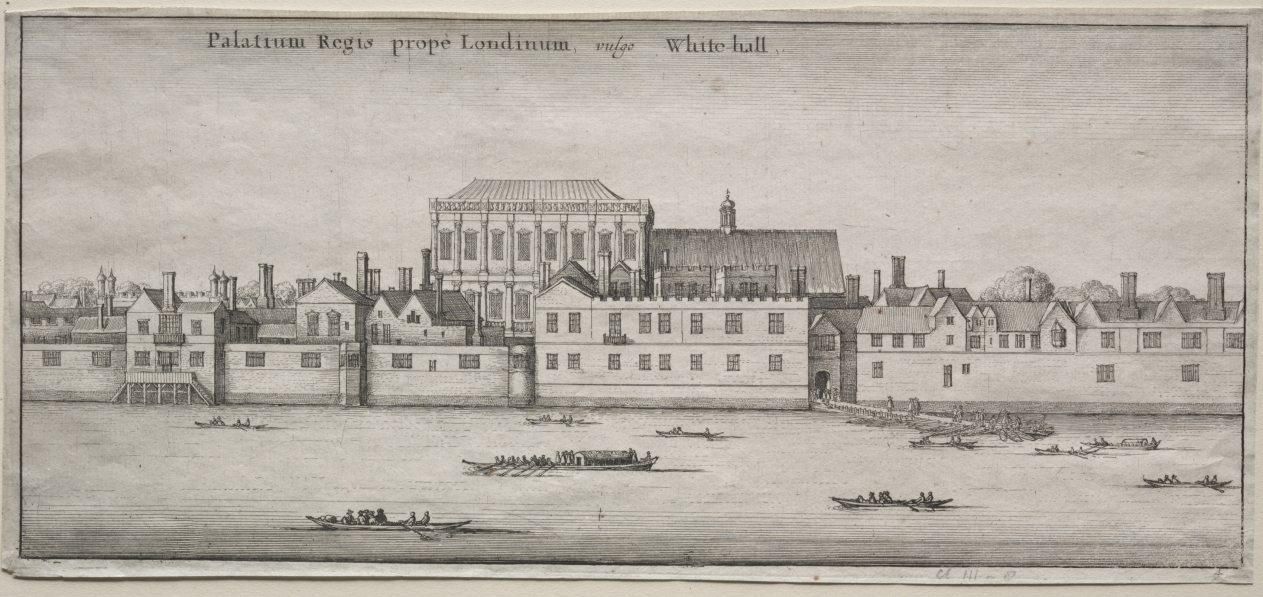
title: Views of London: Whitehall from the River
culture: Bohemia, 17th century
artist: Wenceslaus Hollar (Bohemian, 1607–1677)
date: 1600s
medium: etching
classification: Print